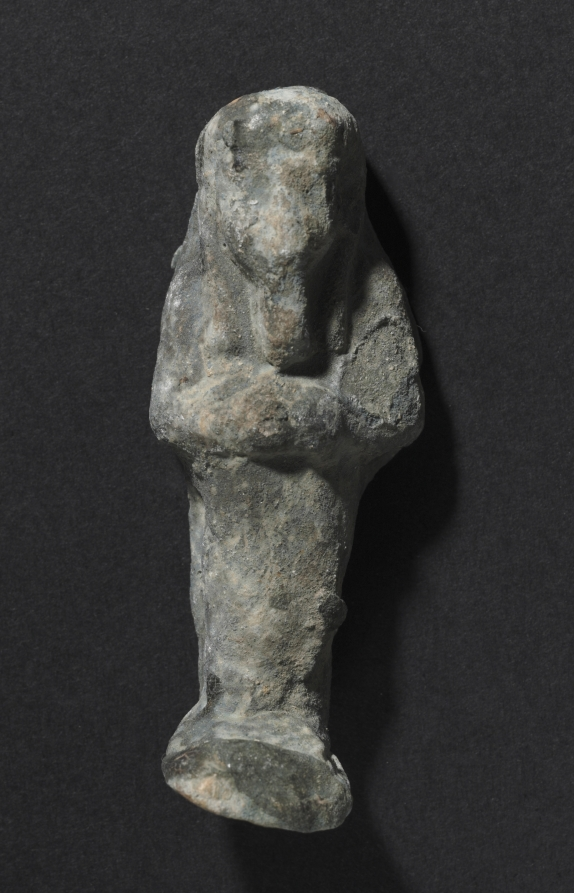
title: Shawabty of Ditamenpaankh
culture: Egypt, Late period (715–332 BCE), Dynasty 25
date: 715–656 BCE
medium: terracotta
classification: Funerary Equipment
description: High demand for shawabtys in the Late Period, a time when as many as 400 or more shawabtys were placed in the tomb with the deceased, gave rise to a specialized container for storing them: the shawabty box. This example is inscribed for the lady of the house, Ditamenpaankh, and was probably one of a pair originally made for her. The single-masted boat on the box's lid is perhaps an allusion to the pilgrimage of the deceased to the holy city of Abydos, the cult city of Osiris, king of the dead. The shawabtys inside are crude, mass-produced examples cast in an open mold. Made of terracotta, their blue paint imitates more costly shawabtys made of faience. As for the shawabty spell, it has been removed from its traditional location on the shawabty's front and relocated onto the sides of box, where it needed only to be written once, thus expediting production.